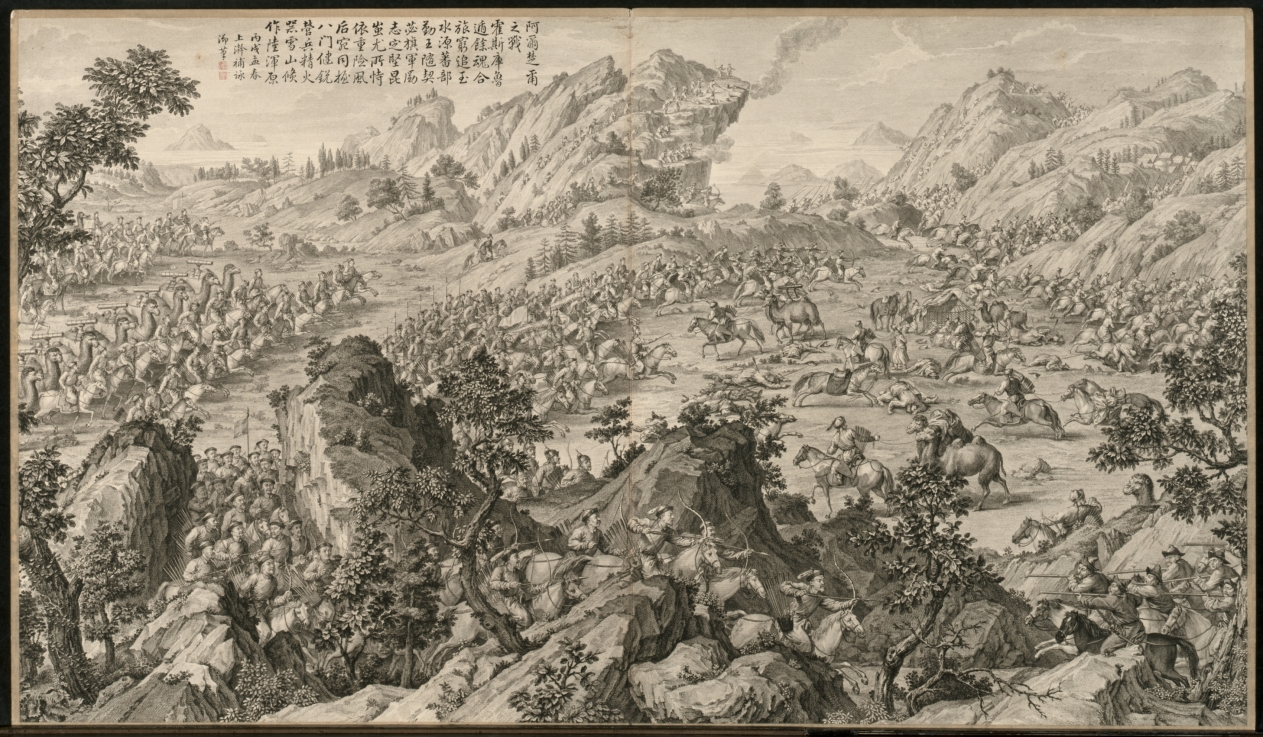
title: Battle at A'erchu'er: from Battle Scenes of the Quelling of Rebellions in the Western Regions, with Imperial Poems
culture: China, Qing dynasty (1644–1911), Qianlong reign (1736–95)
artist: Jean Damascene Sallusti (Italian, d. 1781)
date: c. 1765–74; poem dated 1766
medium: etching, mounted in album form, 16 leaves plus two additional leaves of inscriptions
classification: Print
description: This set of etchings was commissioned by Emperor Qianlong to record in pictorial terms the courage of his generals and soldiers in quelling the rebellions in the Western Regions. Qianlong added his own poem to each of the etchings, indicating his appreciation and pride in this demonstration of military might. "Western Regions" refers to the present-day Xingjiang province, often described in Western writing as "Central Asia."